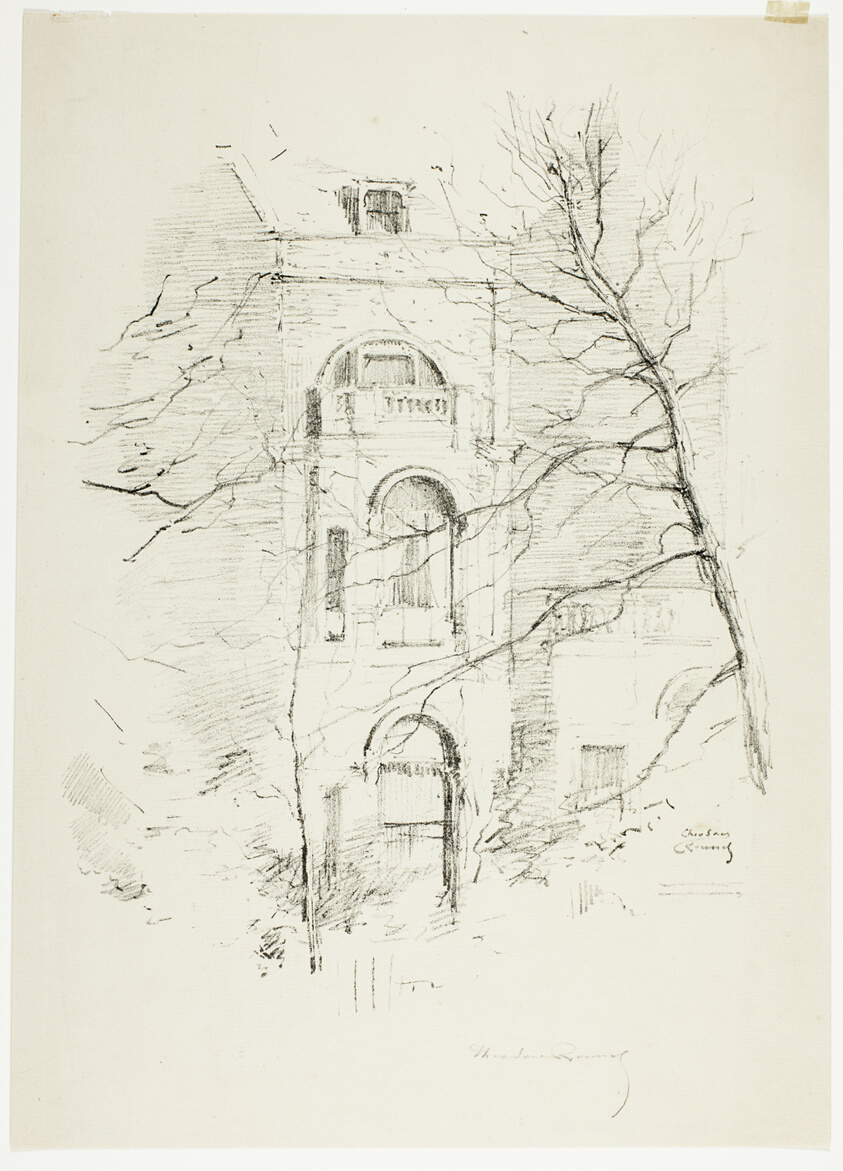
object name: Print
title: Winter, A House in Green Park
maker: Theodore Roussel (French, worked in England, 1847-1926)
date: 1890–94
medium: Transfer lithograph in black on cream laid paper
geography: England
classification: lithograph; paper; print; prints and drawing